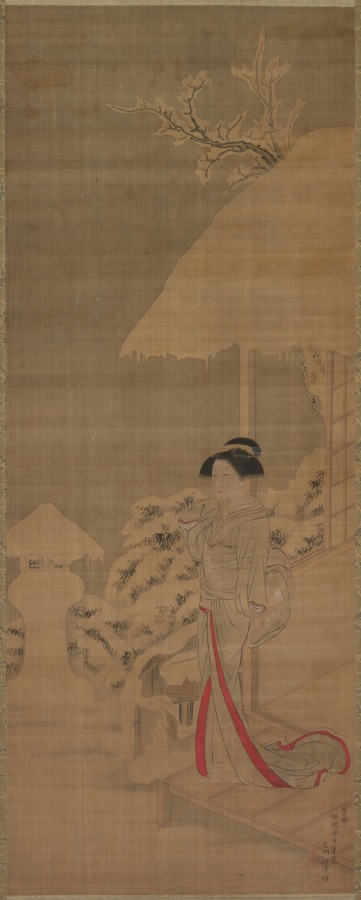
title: Beauty (Bijin) in the Snow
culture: Japan, Edo period (1615–1868)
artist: Shiba Kōkan (Japanese, 1747–1818)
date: c. 1775–1818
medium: hanging scroll; ink and color on silk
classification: Painting